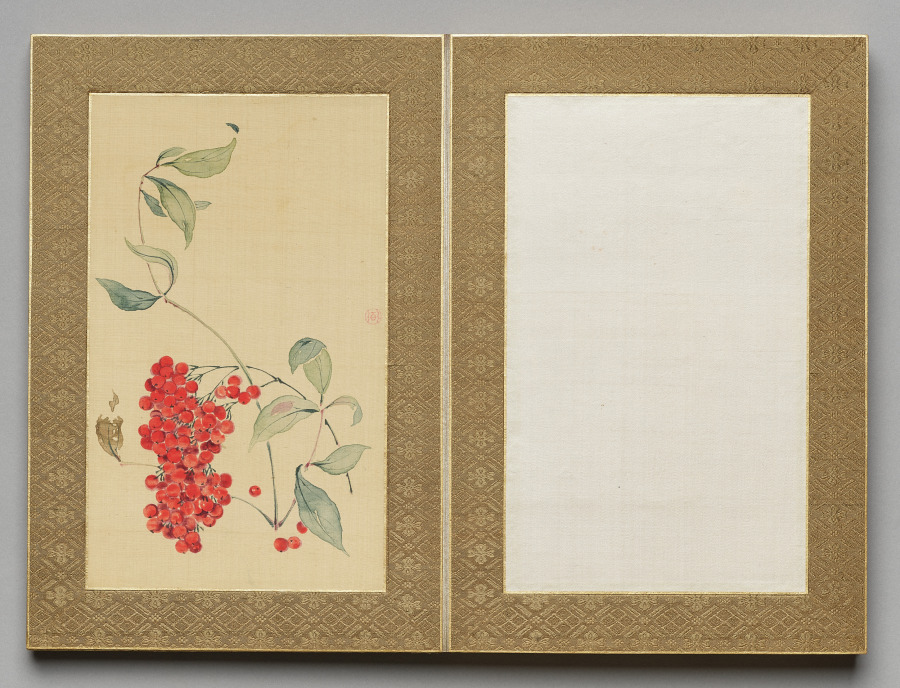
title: Painting from Flowers and Grasses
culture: Japan, Edo period (1615–1868)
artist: Tsubaki Chinzan (Japanese, 1801–1854)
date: 1841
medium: album; ink and color on silk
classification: Painting